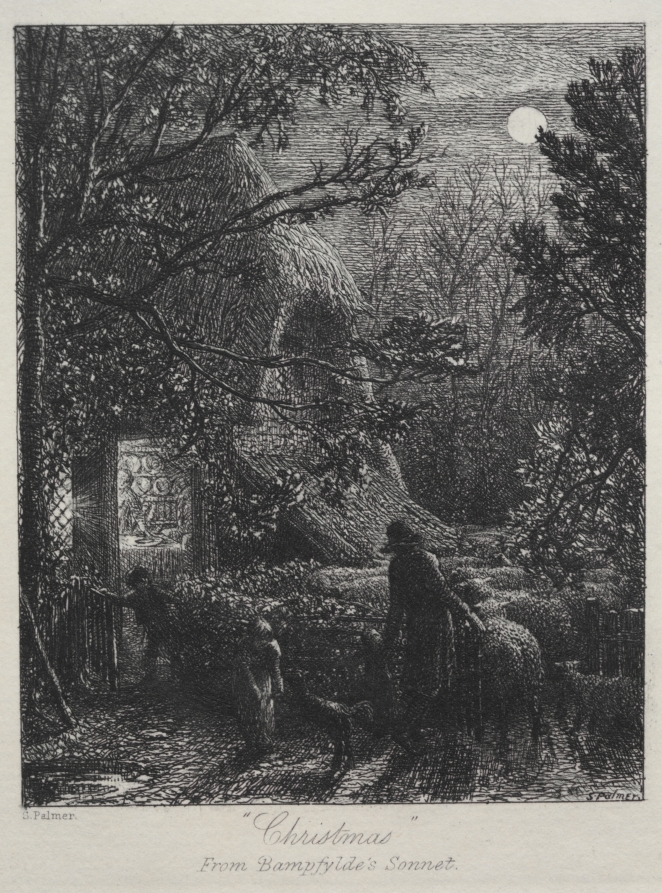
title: Christmas (Folding the Last Sheep)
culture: England, 19th century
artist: Samuel Palmer (British, 1805–1881)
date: 1850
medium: etching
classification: Print